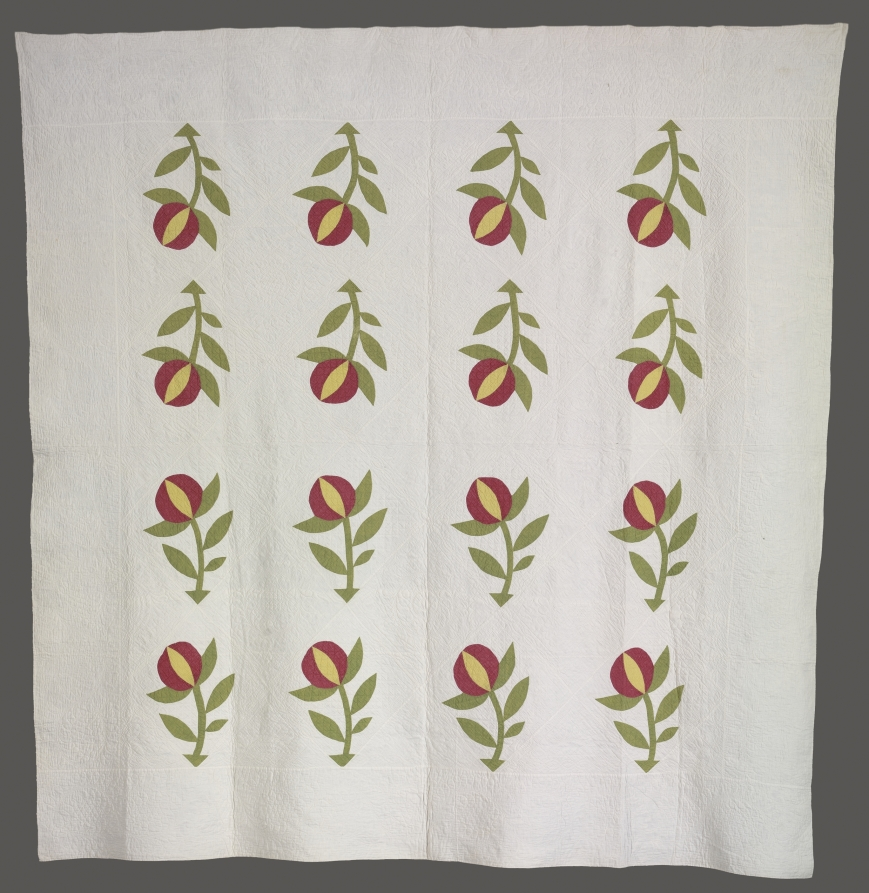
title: Quilt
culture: America, Pennsylvania, Cowan, Late 19th century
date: c. 1880 (?)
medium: cotton, piecework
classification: Textile